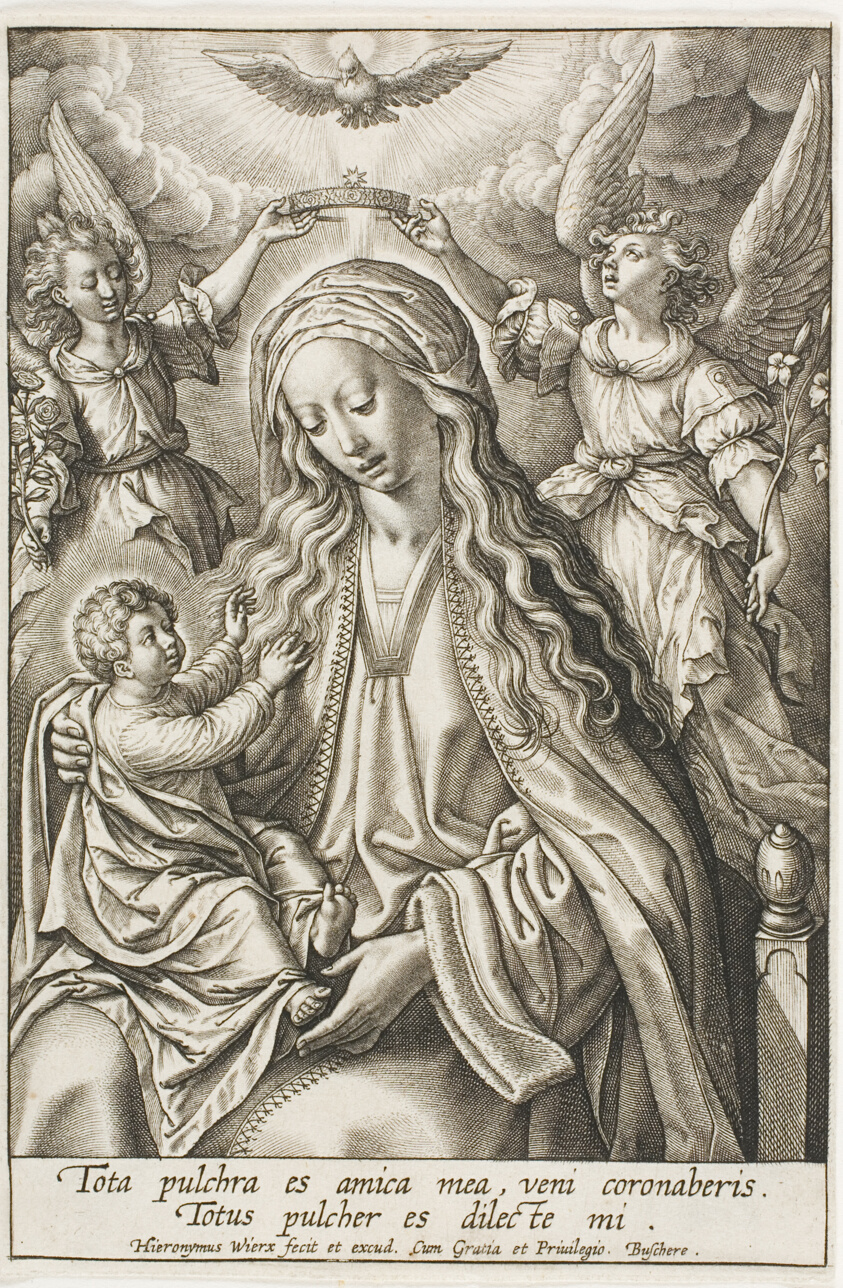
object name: Print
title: Virgin and Child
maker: Jerome Wierix; Flemish, 1553-1619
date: before 1619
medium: Engraving in black on off-white paper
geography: Flanders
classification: engraving; print; prints and drawing